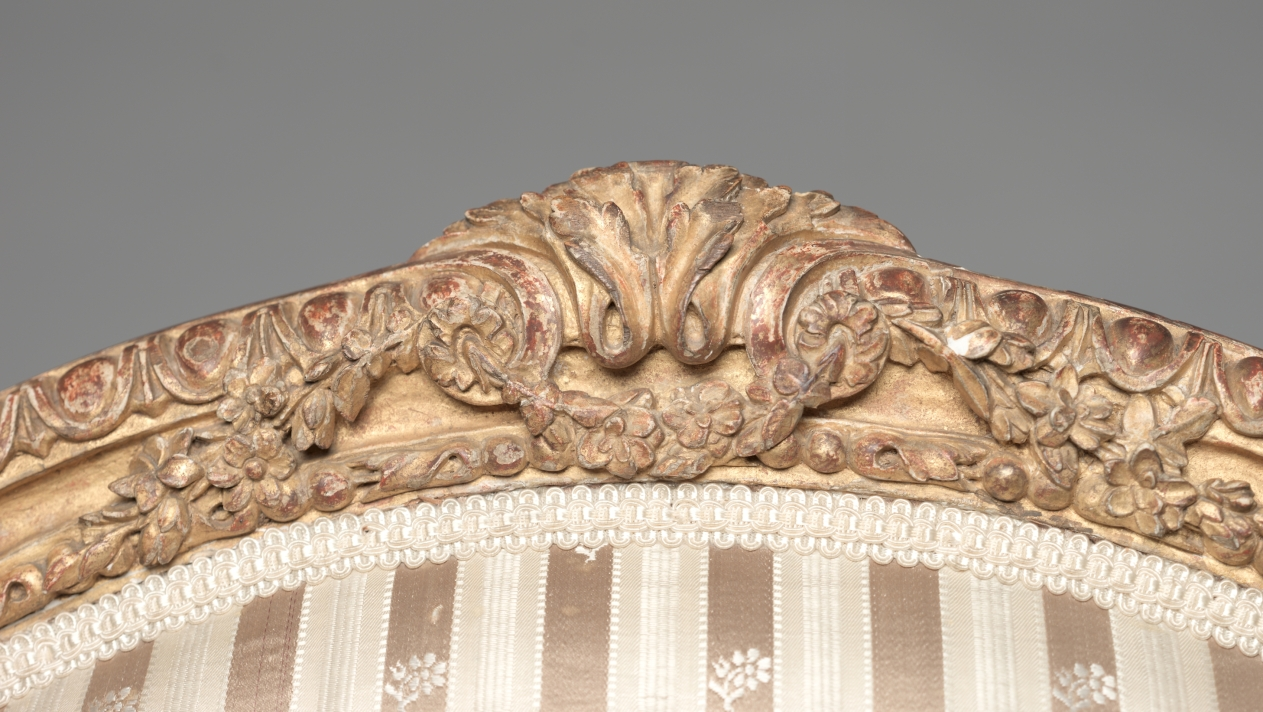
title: Armchair (Fauteuil) (1 of 2)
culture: France, 18th century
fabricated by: Jean-Baptiste II Tilliard (French, 1797)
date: c. 1765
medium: carved and gilded wood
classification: Furniture and woodwork